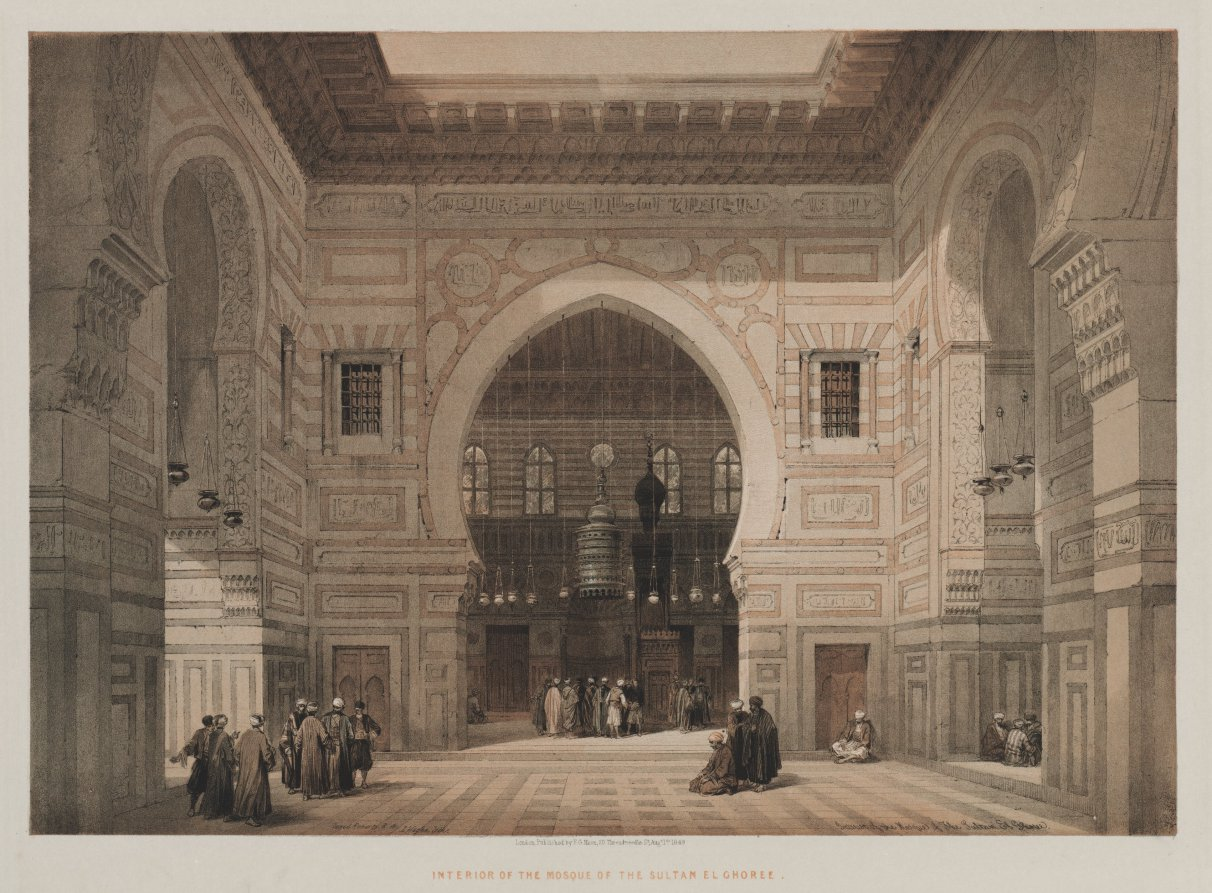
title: Egypt and Nubia, Volume III: Interior of the Mosque of the Sultan El Ghoree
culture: England, 19th century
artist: Louis Haghe (British, 1806–1885)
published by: F. G. Moon (British, 1797–1871)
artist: after David Roberts (Scottish, 1796–1864)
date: 1849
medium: color lithograph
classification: Print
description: The mosque of the Sultan El Ghoree was built by the Mamluk Sultan, Qansuh al-Ghuri (ruled 1501–16) according to sacred proportions. The lavish complex included an elegant fountain, a college, and the sultan’s own mausoleum, which was never used. Today, the mosque is still part of the historic urban fabric of modern Cairo. This print shows a view into its interior. Artist David Roberts travelled in the Middle East and North Africa, particularly Egypt, from 1838 to 1839. During his journey, Roberts produced a great number of sketches. He developed these into watercolors, which were the basis for a series of 247 lithographs made by Louis Haghe, of which this is one.